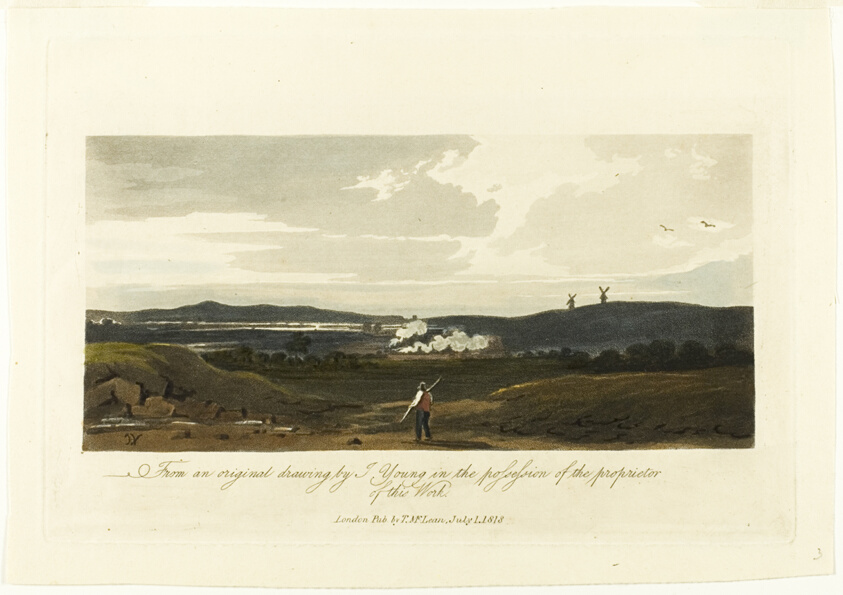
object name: Print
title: Landscape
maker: Unknown Artist (probably British, 19th century); after J. Young (British, active 19th century)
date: published July 1, 1818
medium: Aquatint and etching in black with hand-coloring on cream wove paper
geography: England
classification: aquatint; print; prints and drawing